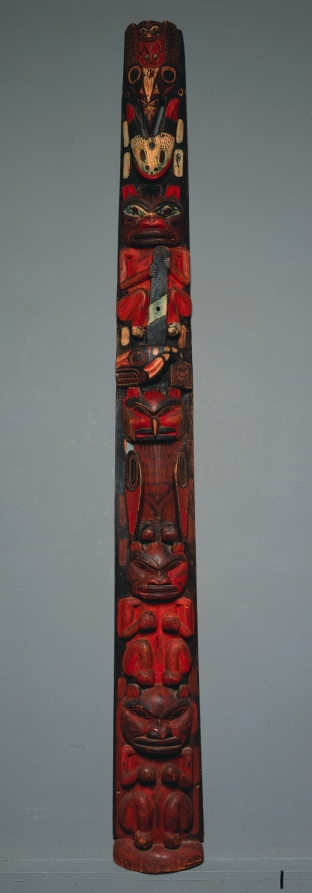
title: Totem Pole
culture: Northwest Coast, Tlingit, 19th century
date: c. 1880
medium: carved and painted wood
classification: Sculpture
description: Native American villages of the Pacific Northwest were marked by great totem poles that proclaimed the rank and ancestry of their owners. This small model pole was once owned by a Tlingit storyteller, a member of the coho salmon clan, of the raven tribe. Because the pole has been stored indoors, its carving and bright, original colors are undamaged by the elements. Reportedly, this totem pole illustrates several stories. Kushda-Kaw, the land-otter, is the pole's lowermost figure; above him is his wife. The wife transforms herself into an owl (the third figure from the bottom) and flies into the trees to keep watch. Kushda-Kaw then lies in wait to frighten and harass unwary passers-by. Above the owl is a finback whale carrying a friend out to sea for fishing. Near the top of the pole is a whale with red lips who has swallowed his enemy, the raven. The tiny figure at the pole's summit is a spirit-woman, the raven's lover. She will cut the whale open to rescue him.